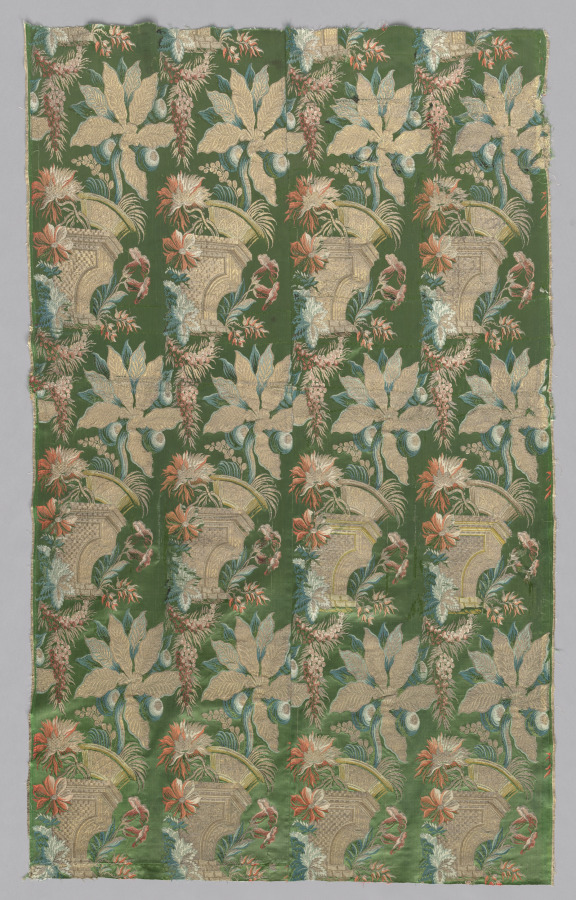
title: Silk Brocade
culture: Italy, Venice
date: late 1600s - early 1700s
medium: brocade; silk and metal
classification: Textile